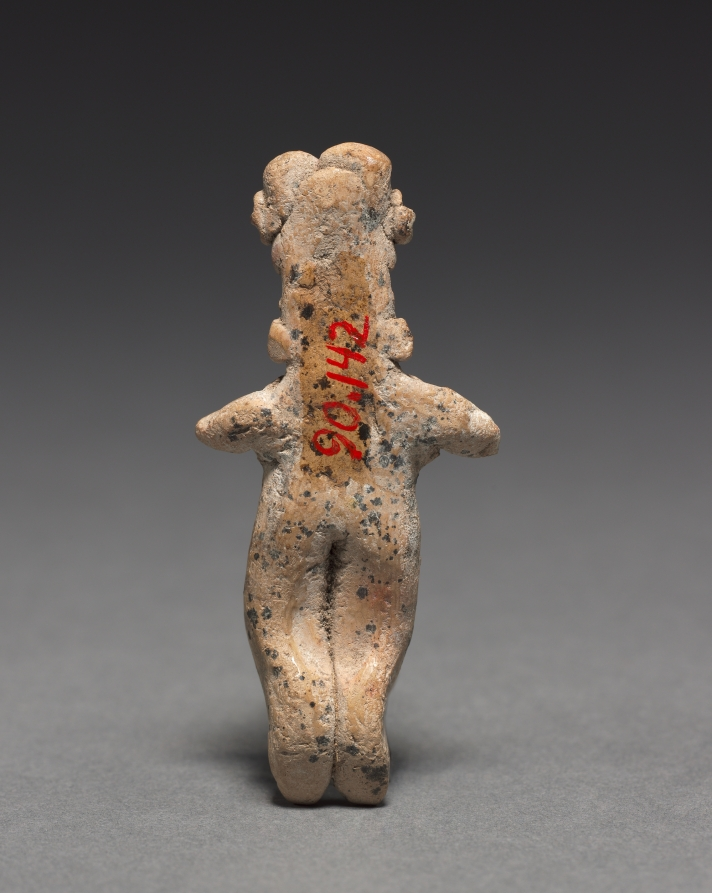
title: Female Figurine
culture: Mesoamerica, Mexico, Guanajuato, Chupícuaro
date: c. 400–100 BCE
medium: earthenware with pigment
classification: Sculpture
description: Small, solid, hand-modeled figurines were a staple of the early Mesoamerican artistic repertoire. Made in distinctive styles corresponding to geographic regions, they likely were used in a variety of contexts, including rites to assure health, fertility, and prosperity. This example is from the Chupícuaro region, north of modern-day Mexico City.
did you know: This figurine is small enough to fit comfortably in the palm of your hand.